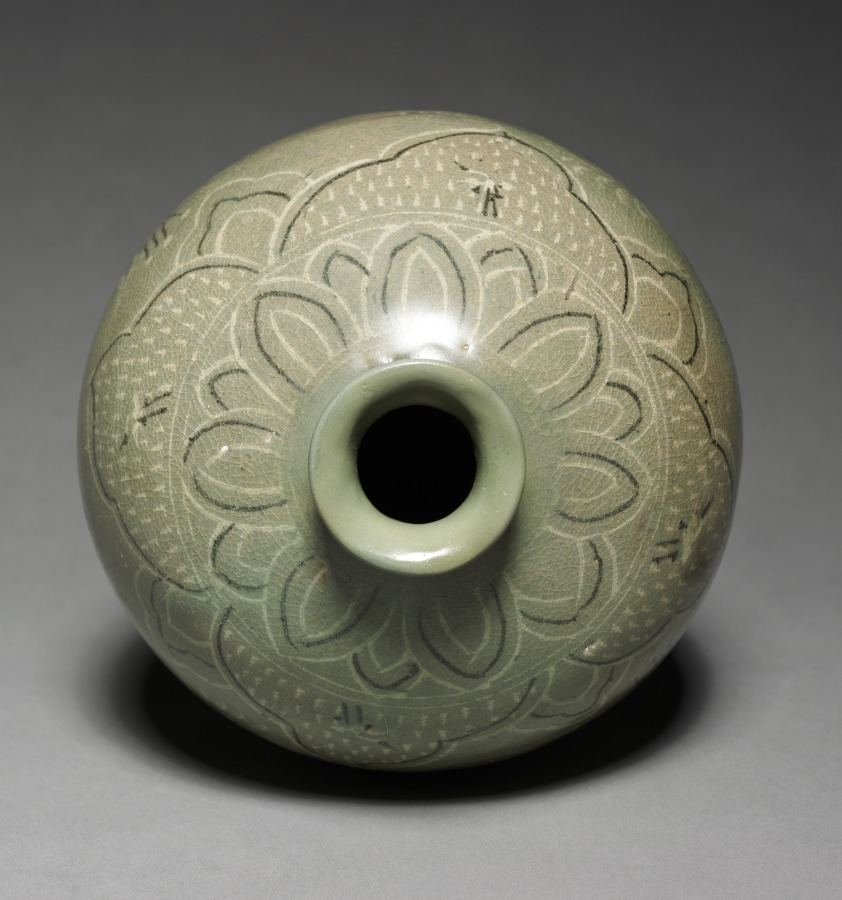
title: Prunus Vase with Inlaid Lotus and Reed Design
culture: Korea, Goryeo dynasty (918–1392)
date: 1300s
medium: Celadon ware with inlaid white and black slip decoration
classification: Ceramic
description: As early as the seventh century, the practice of drinking tea and wine became an important part of elite culture in Korea. Once used to store alcoholic beverages, this type of vase features a wide body followed by a sharply rounded shoulder, a short neck and a small opening. Most of the remaining examples no longer have a lid, but originally it may have had a lid that not only covers the opening, but also served as a cup.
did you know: Prunus vases are often believed to contain a branch of plum blossoms, but recent research reveals that these lidded vases were also used to contain cooking liquid such as sesame oil.